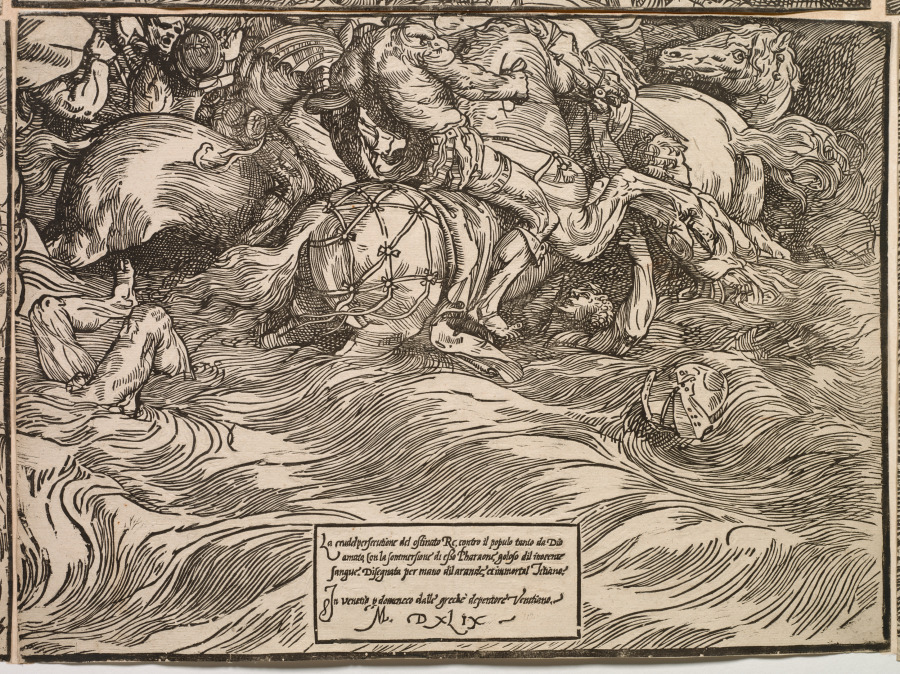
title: The Submersion of Pharaoh's Army in the Red Sea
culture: Italy, Venice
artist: Titian (Italian, c. 1488–1576)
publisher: Domenico dalle Greche (Italian, 1503–1603)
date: 1514–15, printed 1549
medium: woodcut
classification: Print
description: To make this monumental woodcut—considered one of the most ambitious prints of the Renaissance—Titian probably drew directly on the wooden blocks, after which a skilled cutter completed the blocks. The size rivals that of a painting, and the composition would have hung on a wall. Titian’s bold vision presents nature as a vehicle of God’s mercy and wrath. Moses, at right, having parted the seas for the Israelites to pass, commands them to close over the Egyptian forces (Exodus 14:21–31). Titian propelled the narrative with remarkable unity, dedicating entire blocks to the turbulent sea and rolling clouds that culminate in a magnificent cliff and Renaissance city. Some have interpreted the scene as an allegory of Venice’s troubles with the League of Cambrai, a military alliance that threatened the island city.